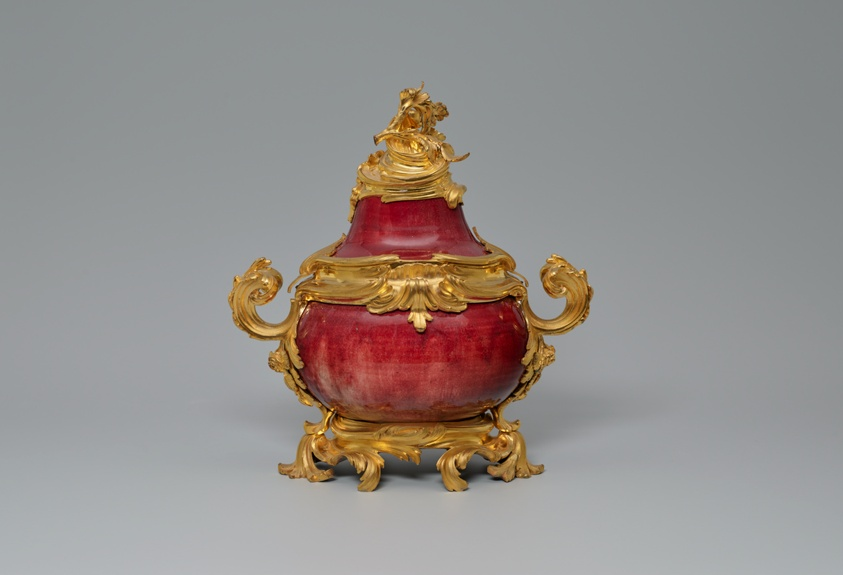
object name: Ceramics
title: Pair of Mounted Vases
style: Rococo, 18th Century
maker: China; Mounts attributed to Jean-Claude Duplessis (French, c. 1695–1774)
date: c. 1750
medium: Hard paste porcelain and gilt bronze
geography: China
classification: vase; france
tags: ormolu, China, foliage